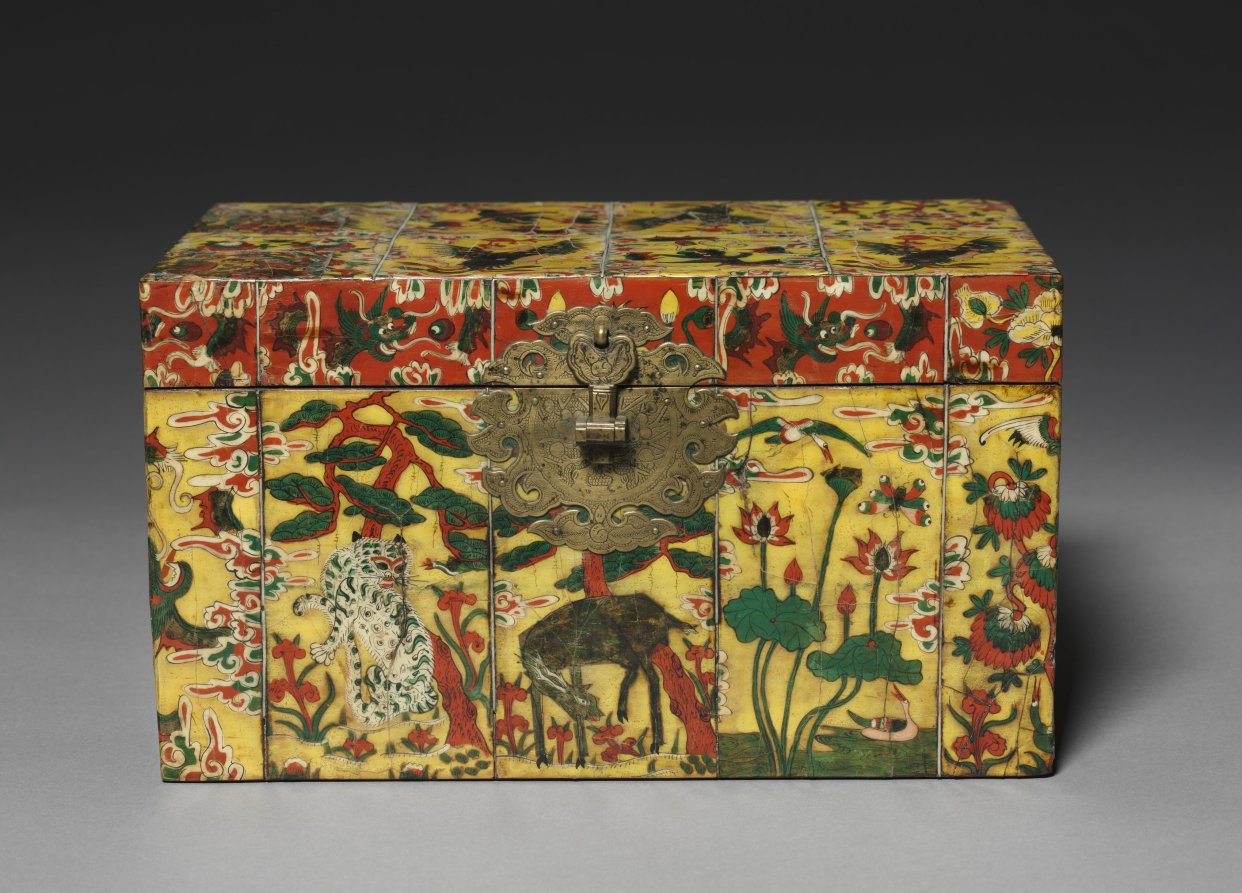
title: Box with Painted Oxhorn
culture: Korea, Joseon dynasty (1392–1910)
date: 1800s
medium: painted wood with flattened ox-horn inlay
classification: Miscellaneous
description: This box is colorfully decorated with the technique of oxhorn plating. The oxhorn was cut, soaked in water, boiled, and then pressed into thin translucent sheets. Since oxhorns are usually rather small, dozens of them were required to fully decorate even a small wooden object. This box is colorfully painted with the imagery of auspicious plants and animals such as dragons amid clouds, a white tiger under the pine tree, a grazing deer, and more. This kind of luxurious box was probably produced as a wedding gift.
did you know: This box is made of small flattened pieces of oxhorn. Since oxhorn is usually rather small, possibly dozens of them were used to fully decorate even a small wooden object like this box.